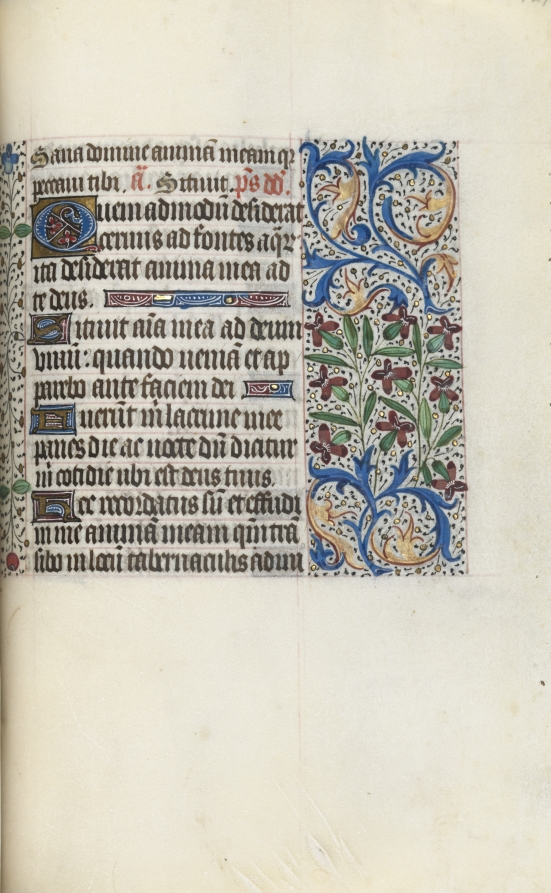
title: Book of Hours (Use of Rouen): fol. 129r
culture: France, Rouen, 15th century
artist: Master of the Geneva Latini (French, active Rouen, 1460–80)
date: c. 1470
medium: ink, tempera, and gold on vellum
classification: Bound Volume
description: In the late 1400s and early 1500s Rouen was an established and important center of book production. The city’s cathedral had a wealthy chapter that spent large sums of money to commission books and to maintain its extensive library. The stationers and booksellers would have likely been concentrated in or near the cathedral precinct. This artist, named after a manuscript now in Geneva, was Rouen’s principal illuminator during the second half of the 1400s.